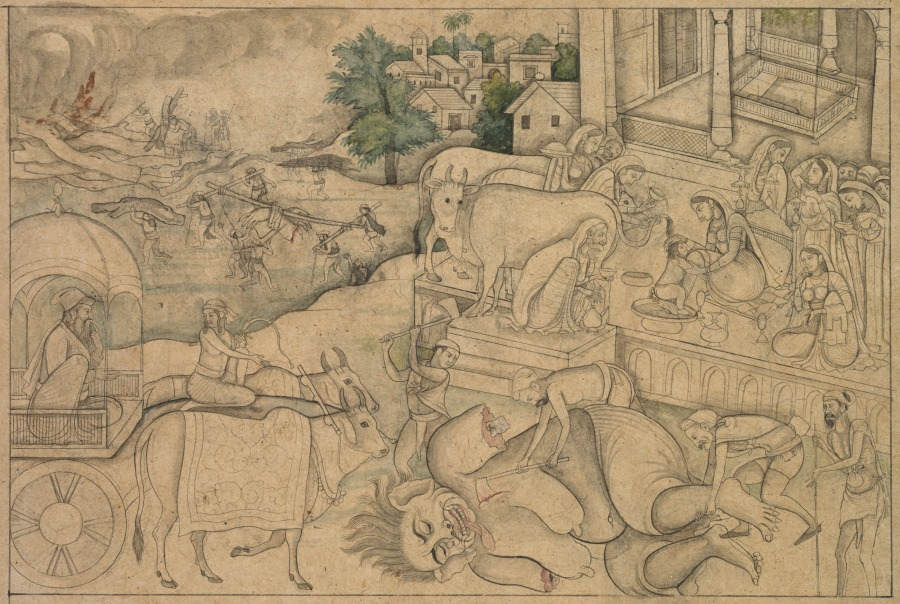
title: Cremation of the demon Putana, from a Krishna-Lila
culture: Northern India, Pahari kingdoms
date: c. 1790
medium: Gum tempera on paper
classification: Painting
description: In the foreground the grotesque oversized corpse of Putana is being cut up with much difficulty by the men of Vraj, the cowherd village where the Hindu god Krishna lived in his infancy and youth. Her forearms and hands are already being conveyed to the massive pyre at the upper left. Krishna’s foster father Nanda, the elder of the village, has come in a bullock cart to survey the situation, putting his finger to his mouth in the gesture of astonishment. At the right, baby Krishna is being bathed as cowherd women look on in shock. Krishna, who was incarnated in order to rid India of a tyrannical king, vanquished a series of his assassins, including Putana. Putana had come to the cowherd village in the form of a beautiful nursemaid with secretly poisoned breasts. When she began to nurse Krishna, instead of being poisoned by her, Krishna sucked the very life out of her, at which point she resumed her true form. Although unfinished, this painting reveals the care the artist took with the drawing and shading of the figures.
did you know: Lila means “divine play” in Sanskrit.